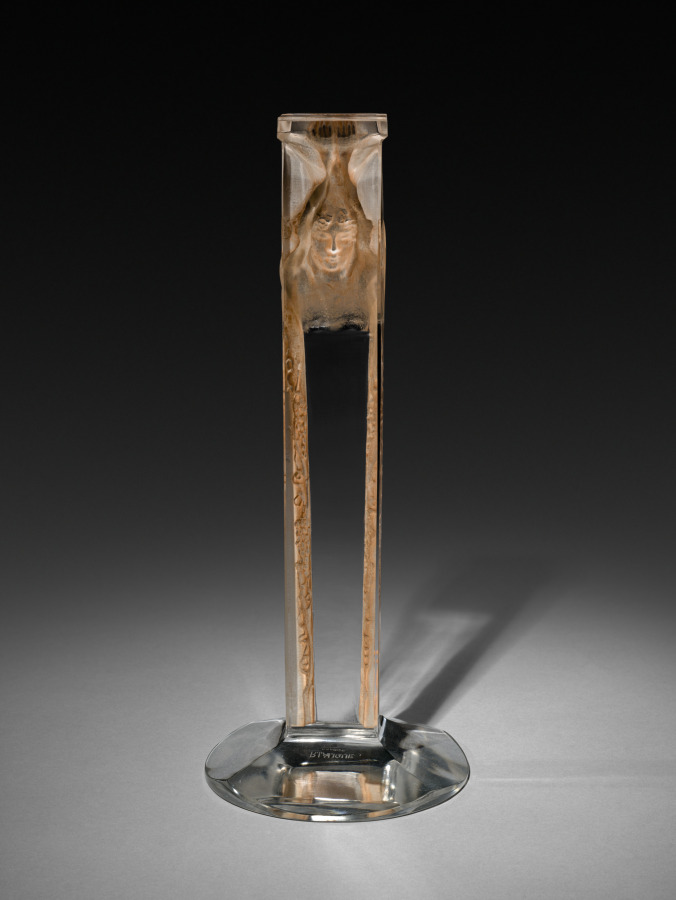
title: Bacchus Figural Centerpiece Support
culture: France, 20th century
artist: René Lalique (French, 1860–1945)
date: 1923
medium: Cast and patinated glass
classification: Glass